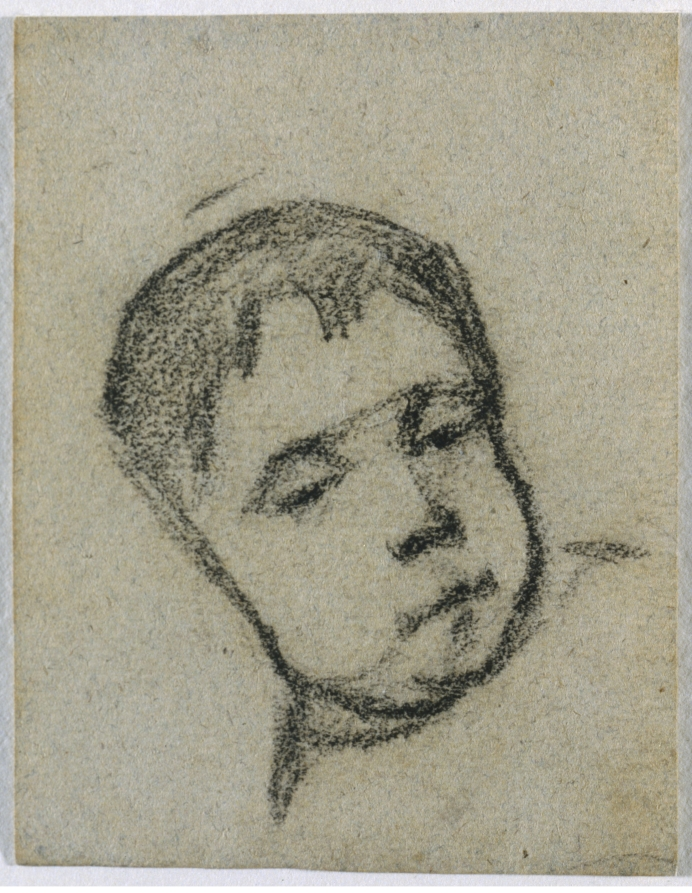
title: Emil Gauguin as a Child, Head on a Pillow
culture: France, 19th century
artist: Paul Gauguin (French, 1848–1903)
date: c. 1875–1876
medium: black crayon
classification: Drawing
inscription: VERSO, upper center, in graphite [?]: [illegible]stre